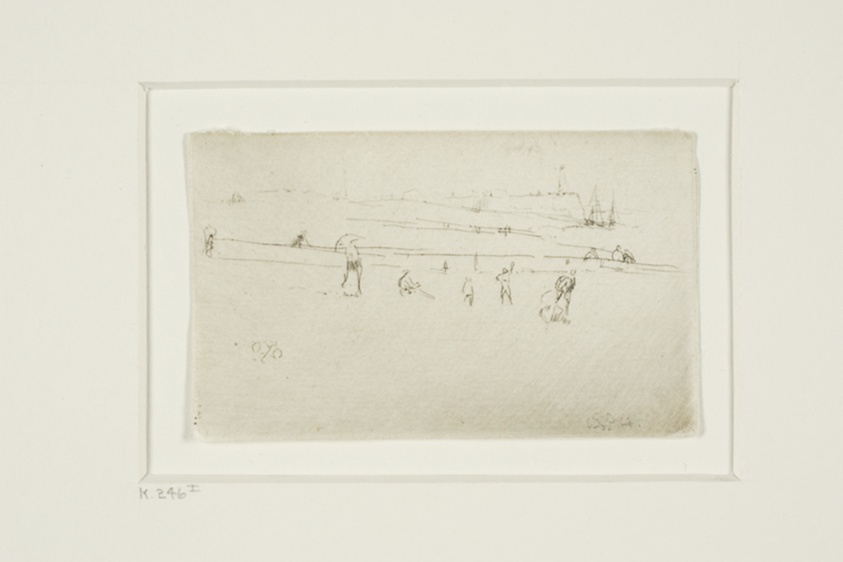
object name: Print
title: Dieppe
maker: James McNeill Whistler (American, 1834-1903)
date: 1885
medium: Etching and drypoint in black ink on ivory laid paper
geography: United States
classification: etching; print; prints and drawing; paper; drypoint